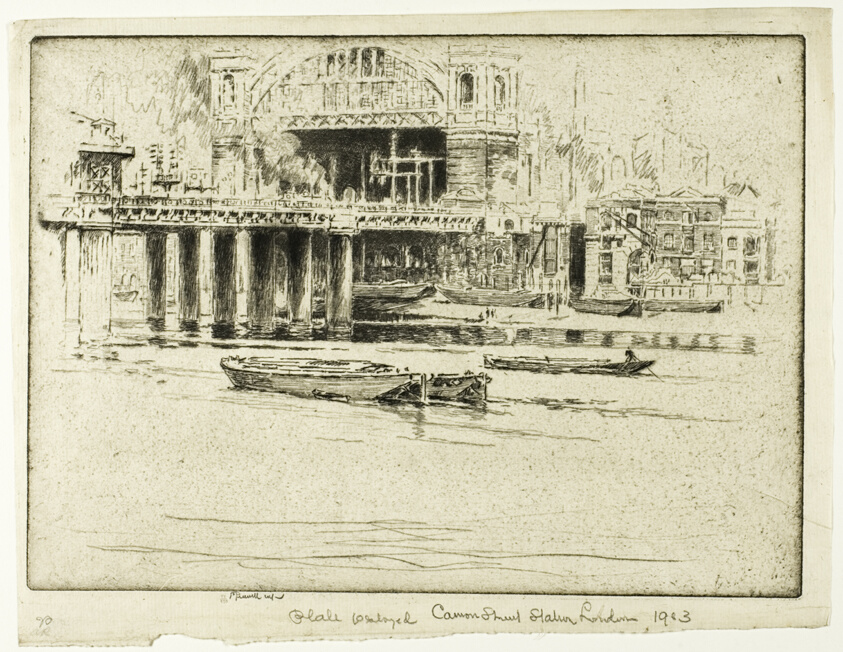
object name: Print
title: Cannon Street Station, from the River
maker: Joseph Pennell (American, 1857-1926)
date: 1905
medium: Etching with drypoint in foreground on ivory laid paper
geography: United States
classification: etching; print; prints and drawing